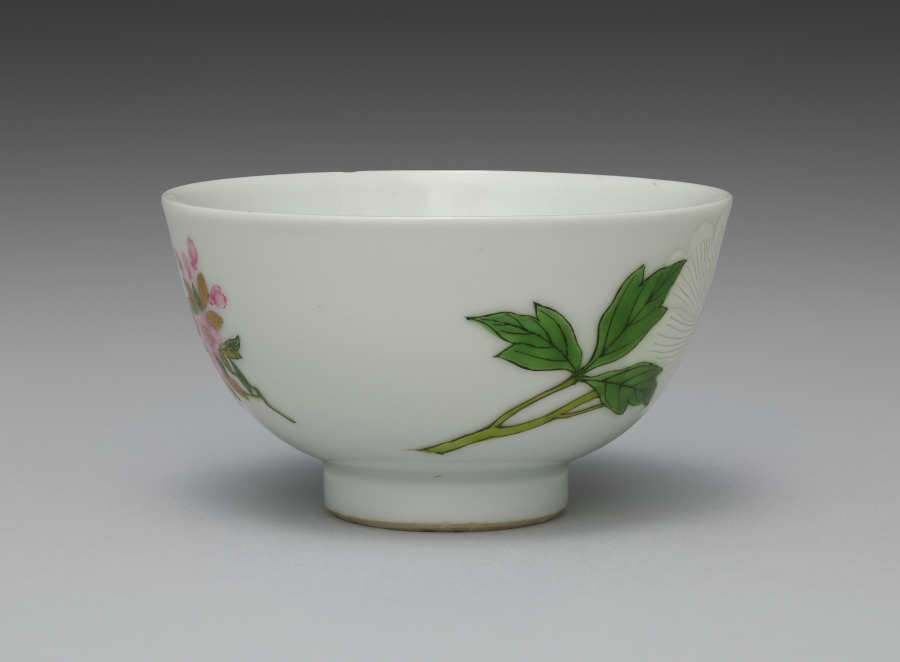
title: Teabowl from Teabowls with Peony and Crabapple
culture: Japan, Meiji period (1868–1912)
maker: Seifū Yohei III (Japanese, 1851–1914)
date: 1893–1914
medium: One from a set of five teabowls; porcelain with underglaze and overglaze color enamels and gold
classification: Ceramic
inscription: 清風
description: Overglaze color enamels are generally called iro-e (literally “color picture”) in the terminology customarily used for porcelain decoration of the Edo period. This set of teabowls is a fine example of Yohei III’s skilled use of the technique, which is identified on this set’s box lid with the alternate phrasing “porcelain with color painting” (jisaiga). Distinct from the way overglaze colors were used in Kakiemon ware from Arita, his designs and applications show a consciousness of porcelain decoration of the Qing dynasty. Here, he combines Chinese models with a sensibility taken from Kyoto ware precedents, including painting with powdered gold (kinrande). The colors used in the bowls are as follows: blue, black, gold, white, light green, green, and pink. The blue appears only inside the footring, as a double band of underglaze color. The black iron, used for stems and leaf veins, is painted over the glaze. The gold, also painted over the glaze, is used for leaves and the centers of flowers, for solid, glossy lines defining detail, or as a semimatte ground. The white of the peony flower is built up to a low relief over the glaze. Yohei has incised lines of varying widths into the pigment, carving away to the bowl’s surface, to differentiate individual petals and their rippled shapes. The light and dark greens, as well as the pink, are painted over the glaze. Of note is how Yohei has first used thinly applied lines of light green to draw the plum branch before applying the opaque iron black. For the plum buds and flowers, he has used a diluted pink with an opaque pink for outline, both over the glaze. In his later works, Yohei used pink both over and under the glaze in a manner similar to underglaze blue, and it can be challenging in some cases to discern which technique he has used. A lidded container in a private collection has a similar design but is augmented with the inclusion of white and purple magnolia blossoms. In contemplating the original decorative program of a set, of which these teabowls may have been a part, it is worth considering that perhaps not all objects included the full range of motifs. In such cases, the composition of the individual object may be best understood within the context of the extended ensemble. Here, the delicate pink plum on one side of the bowl seems slightly unbalanced with the bold white peony on the other, but when seen with other objects with the magnolia and its additional colors and shapes, it is possible to imagine a set with a complex, balanced design across multiple pieces.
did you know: Yohei III used the kinrande technique of painting with powdered gold to embellish the flowers.